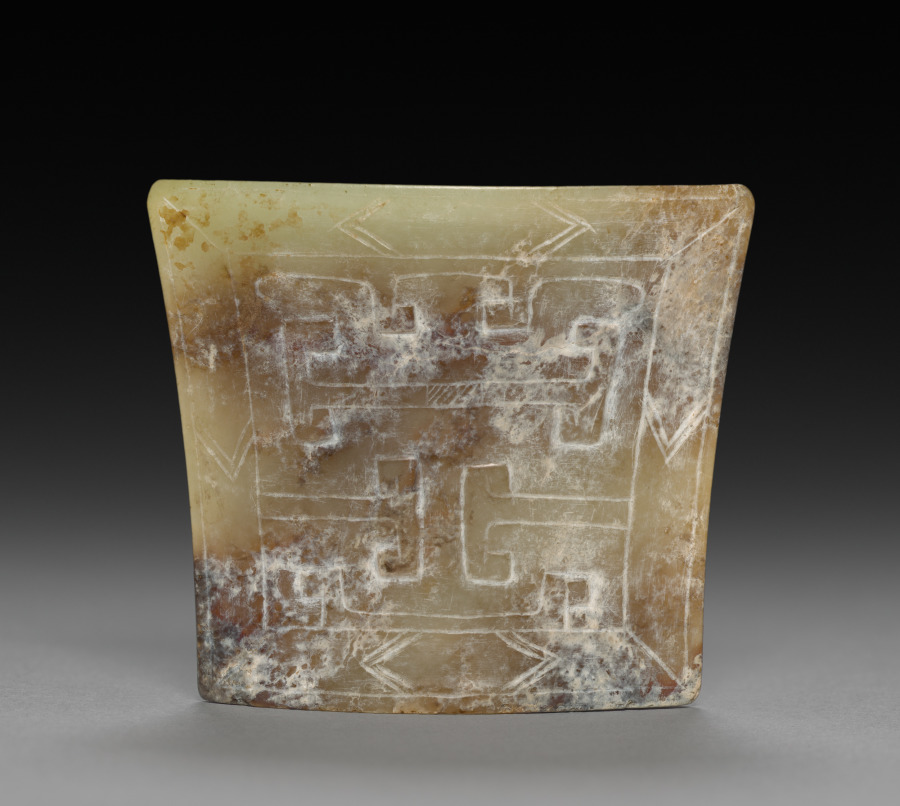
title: Scabbard Chape (Bi)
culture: China, Han dynasty (202 BCE–220 CE)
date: 206 BCE–220 CE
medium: jade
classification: Jade